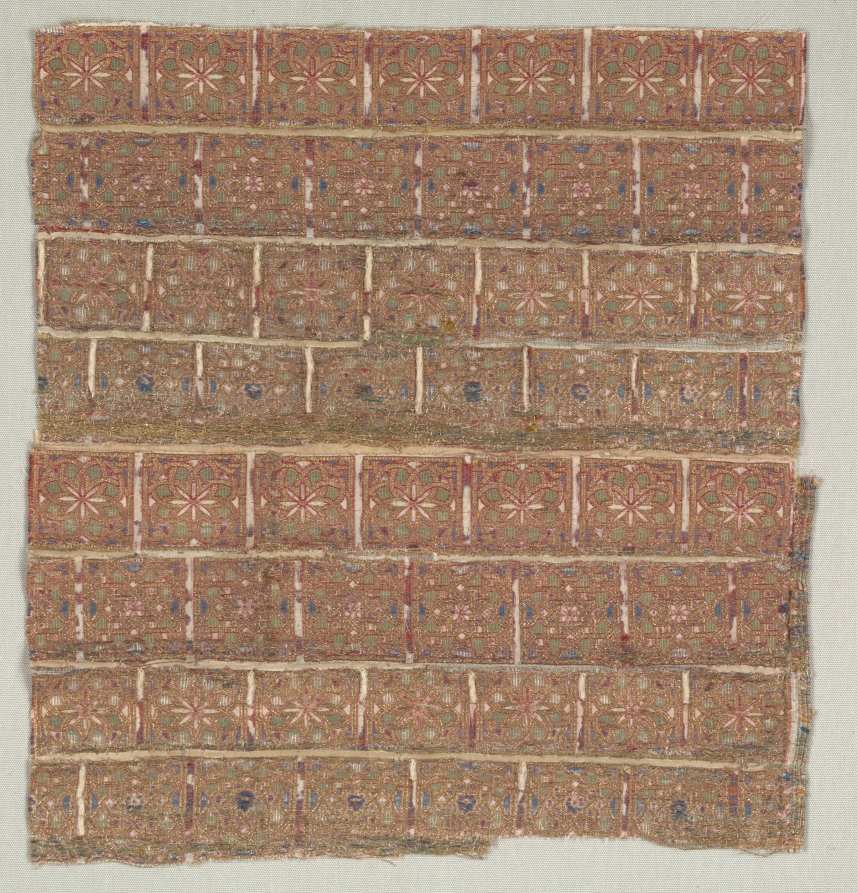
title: Vestment fragment with stars in staggered squares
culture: Spain, probably Almeria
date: 1200s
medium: Silk and gold thread: lampas weave with areas of double cloth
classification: Textile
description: Alternating rows of two different forms of interlacing stars set within square frames convey a jewel-like brilliance with gold and contrasting colors. This fragment was reused in an ecclesiastical vestment that made its way to the cathedral at Lleida in Catalonia, in northeastern Spain. A document dated 1275 records that the Bishop of Lleida and his companions brought “[A] complete set of vestments, of Muslim manufacture, which ornaments they dedicated to San Valero.”